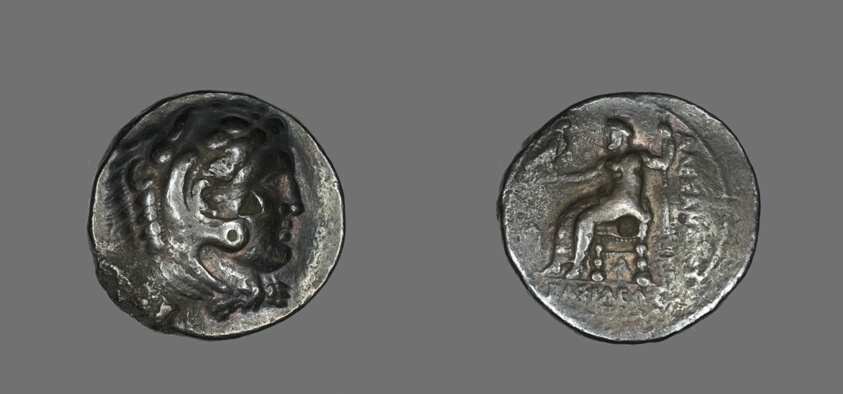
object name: Coin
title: Tetradrachm (Coin) Portraying Alexander the Great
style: greek, ancient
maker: Greek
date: 356-323 BCE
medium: Silver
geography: Ancient Greece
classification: coin; ancient art